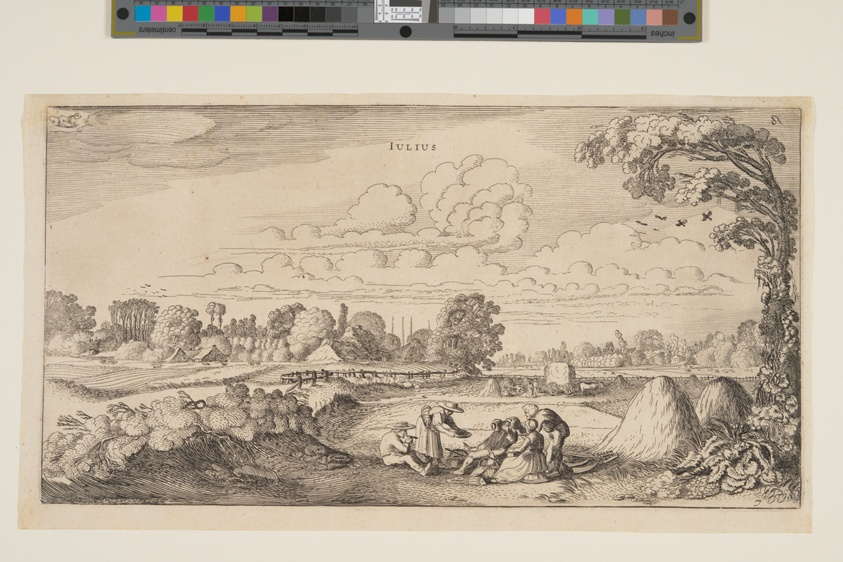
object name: Print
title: July, from The Twelve Months of the Year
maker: Jan van de Velde II (Dutch, c. 1593–1641); after Willem Buytewech (Dutch, c. 1591–1624)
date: 1616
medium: Etching on ivory laid paper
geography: Netherlands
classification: etching; paper; print; prints and drawing